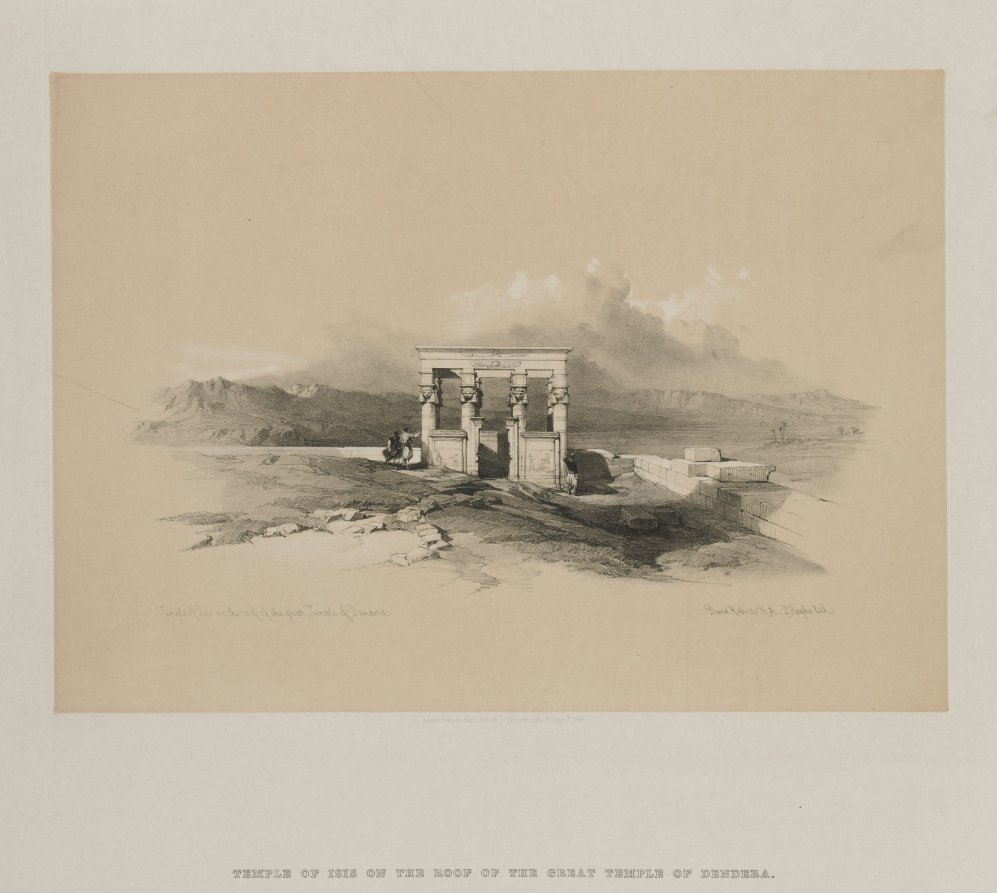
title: Egypt and Nubia, Volume II: Temple of Isis on the Roof of the Great Temple of Dendera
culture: England, 19th century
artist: Louis Haghe (British, 1806–1885)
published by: F. G. Moon, 20 Threadneedle Street, London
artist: after David Roberts (Scottish, 1796–1864)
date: 1848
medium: color lithograph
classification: Print